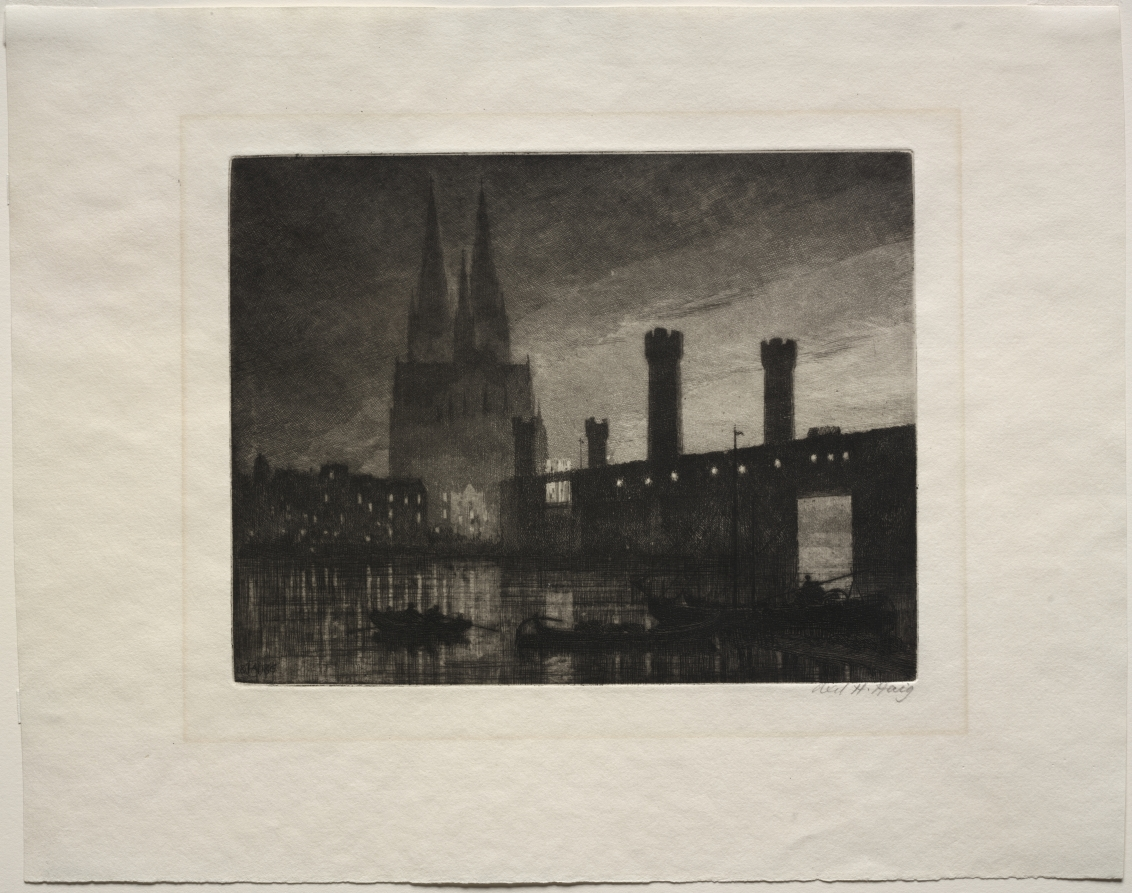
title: Cologne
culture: Sweden, 19th century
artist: Axel Herman Haig (Swedish, 1835–1921)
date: 1886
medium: etching and aquatint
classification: Print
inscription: signed in pencil, lower right in margin: Axel H. Haig